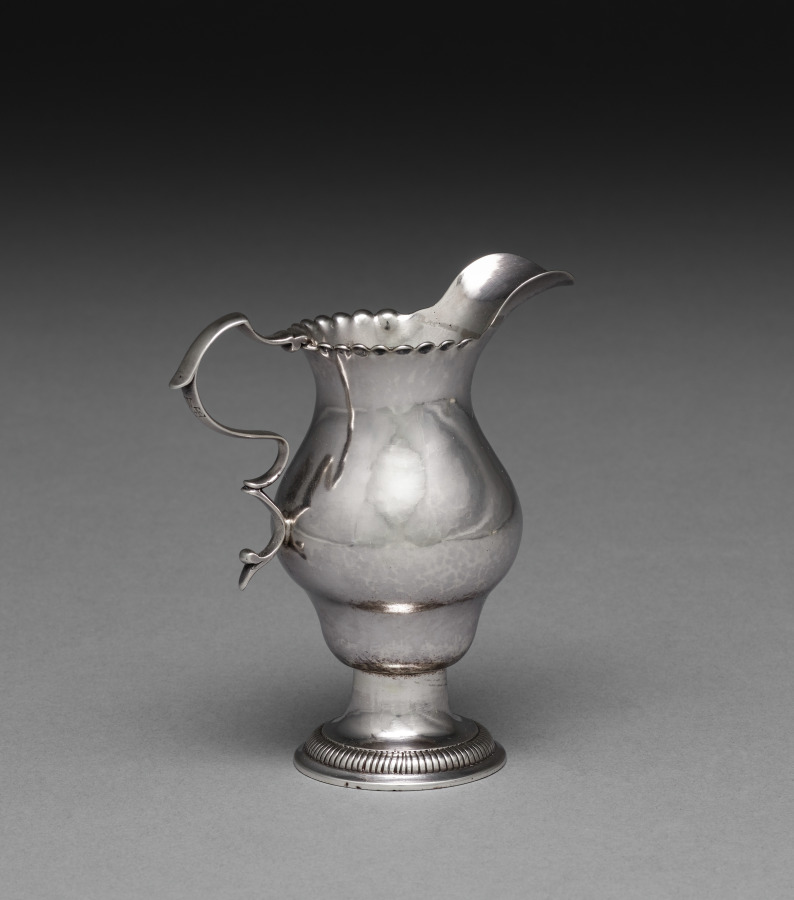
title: Cream Jug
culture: America, Massachusetts, Boston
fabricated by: John Coburn (American, 1725–1803)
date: c. 1780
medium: silver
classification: Silver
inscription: engraved: "W" over "A + E" in block letters on handle, below grip.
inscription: Stamped underside: "I.Coburn"